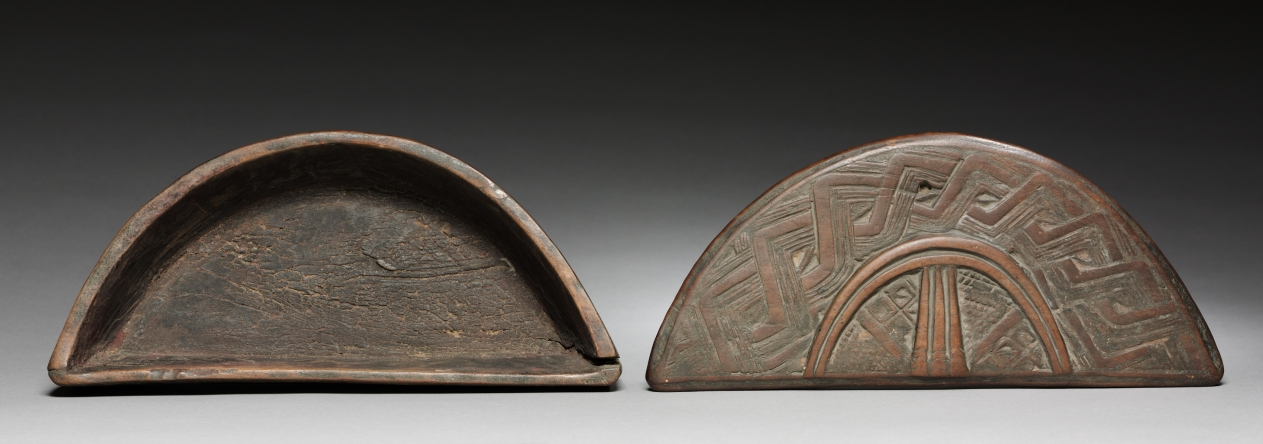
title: Box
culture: Africa, Central Africa, Democratic Republic of the Congo, Kuba-style maker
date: early 1900s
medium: Wood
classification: Vessels